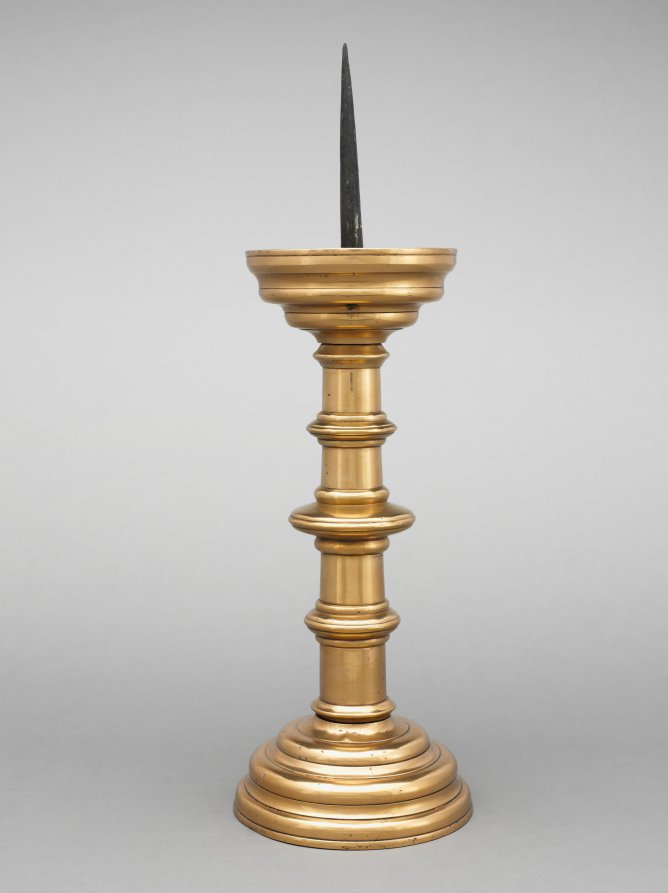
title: Pricket Candlestick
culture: South Netherlands, Valley of the Meuse, 16th century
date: early 1500s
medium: brass (hollow cast in three parts) and iron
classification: Metalwork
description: This object is an example of a type of metalwork known as "dinanderie," produced in and around the town of Dinant on the River Meuse in the Belgian province of Namur. Late medieval Dinant specialized in the production of these finely cast and finished objects in brass alloy, supplying aquamanilia, candlesticks, patens, basins, baptismal fonts, and other altar furniture throughout the Meuse Valley and for export beyond.